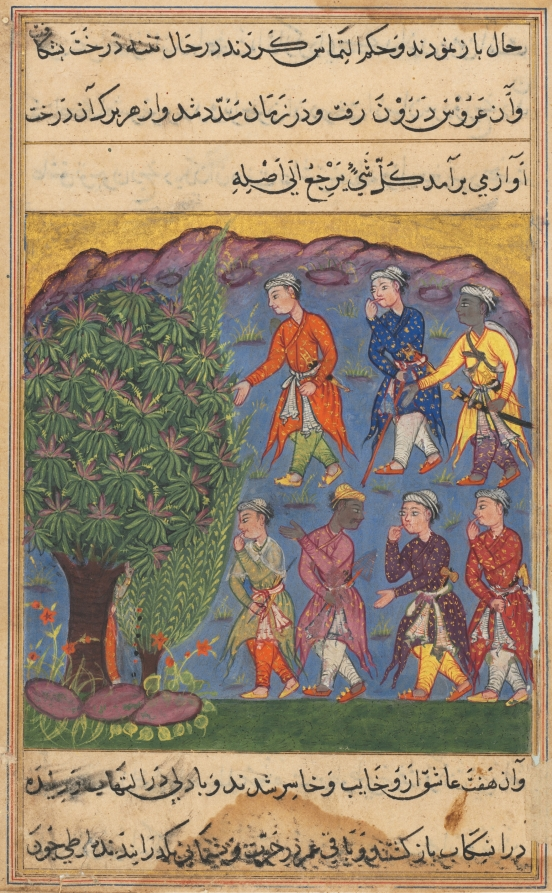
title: Seven men disputing possession of a woman bring her before the Tree of Justice into which she is absorbed, from a Tuti-nama (Tales of a Parrot): Sixth Night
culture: Mughal India, court of Akbar (reigned 1556–1605)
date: c. 1560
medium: gum tempera, ink, and gold on paper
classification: Painting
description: Talking trees that predict the future or administer justice recur in medieval Indo-Iranian literature. Here, the blossoming Tree of Justice settled a dispute. Seven different men wanted to marry a woman who had been carved as a wooden statue by the carpenter (lower right in red) and brought to life by the holy man (lower left in green). A sliver of the woman’s body is seen merging with the trunk. The Tree of Justice decided to absorb her, and as she disappeared the tree proclaimed: “Everything must revert to its own origin.”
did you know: A few tools, such as a hammer and an axe, designate the men’s professions.